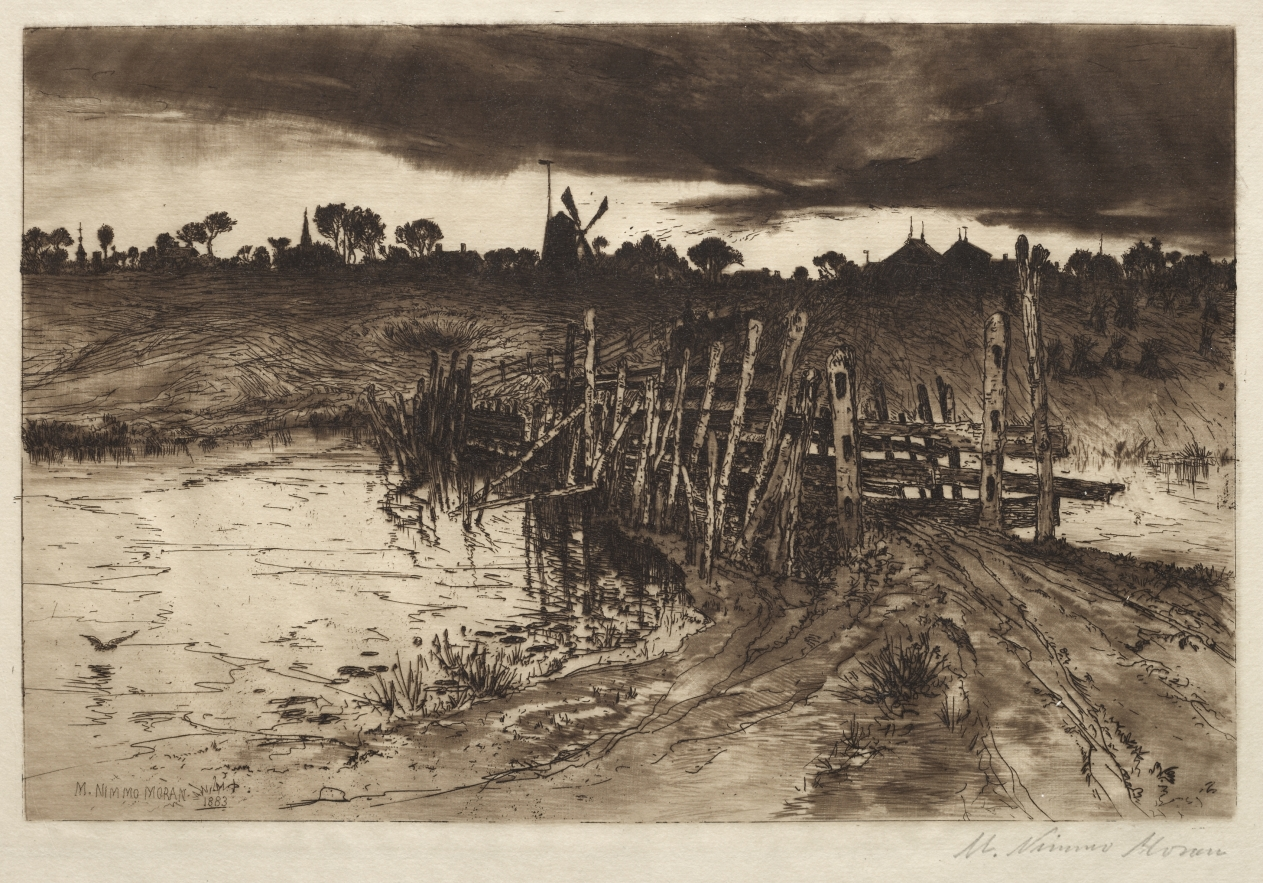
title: Tween the Gleamin and the Mirk, When the Kye come Hame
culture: America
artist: Mary Nimmo Moran (American, 1842–1899)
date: 1883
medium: etching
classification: Print